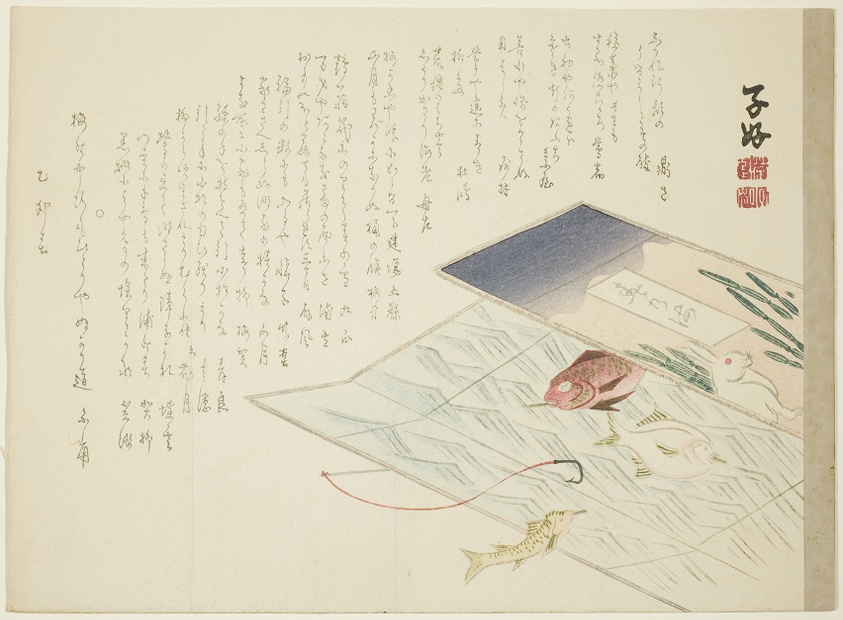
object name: Print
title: Rabbit and Fish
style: Japanese (culture or style)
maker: Shiko; Japanese, active 19th century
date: spring 1855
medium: Color woodblock print; surimono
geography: Japan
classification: woodblock print; print; asian art